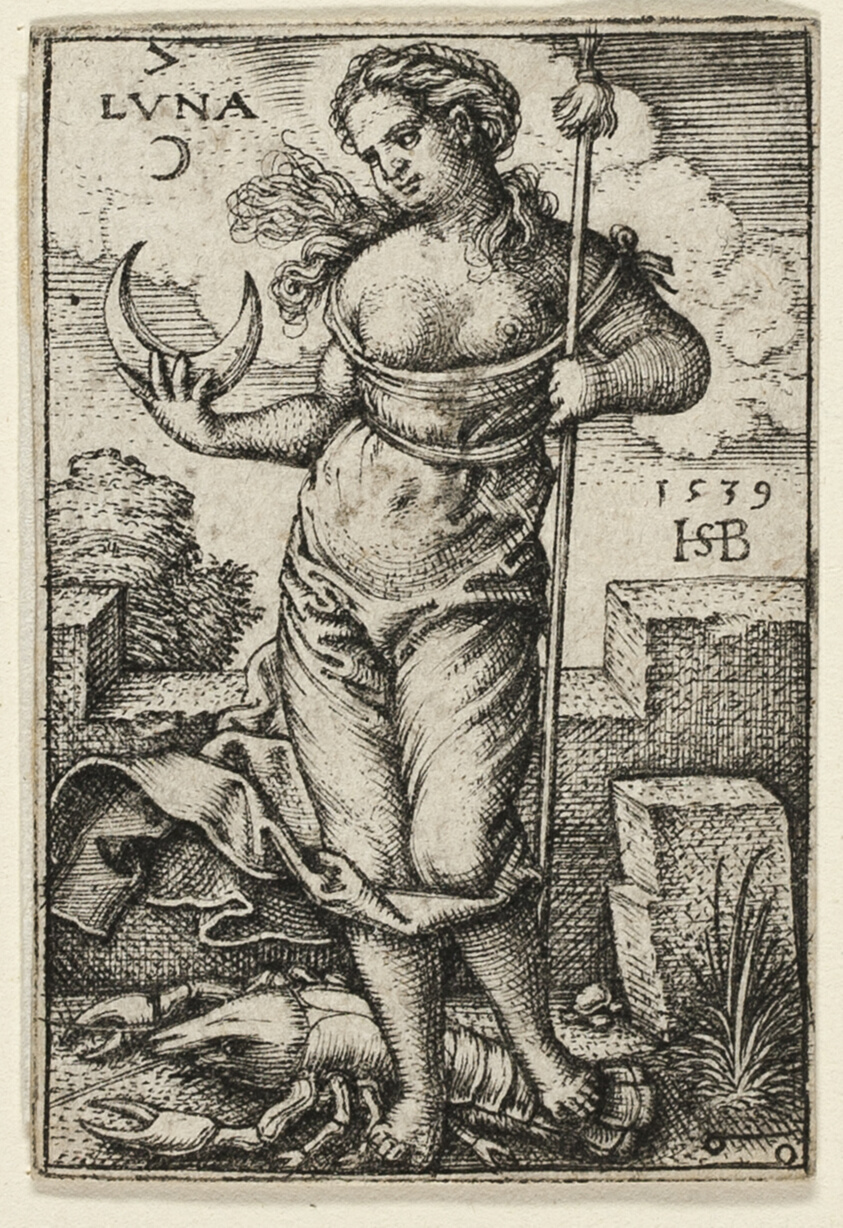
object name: Print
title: Moon, plate seven from The Seven Planets with the Zodiacs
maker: Sebald Beham; German, 1500-1550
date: 1539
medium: Engraving in black on ivory laid paper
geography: Germany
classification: print; prints and drawing; engraving